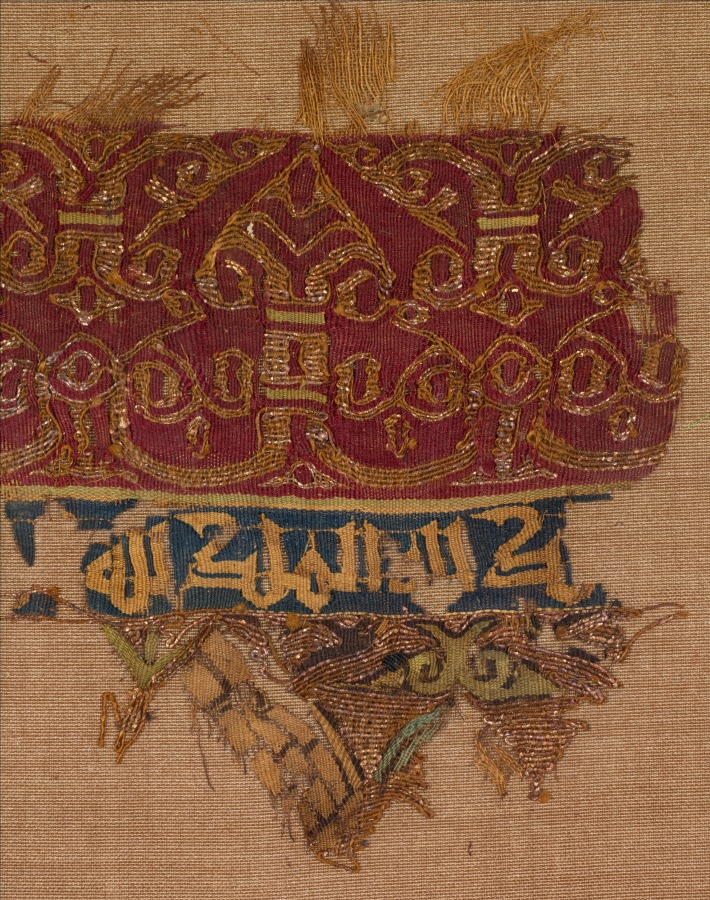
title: Tiraz with gold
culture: Egypt, Fatimid period, reign of Caliph al-Hakim, 1013–1020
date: 1013–1020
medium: plain weave with inwoven tapestry weave: linen, silk, and gold filé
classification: Textile